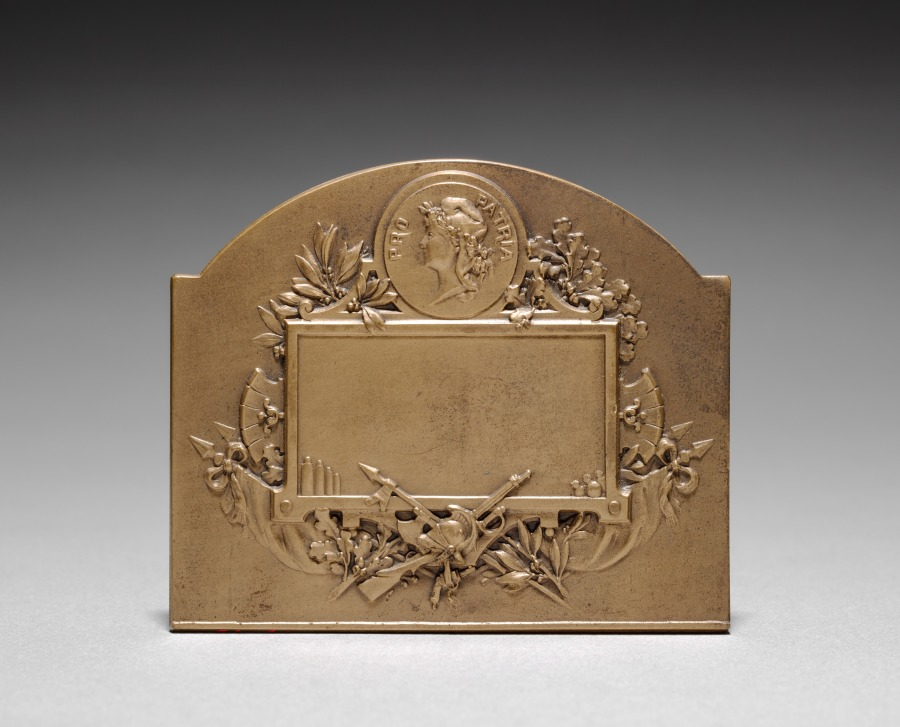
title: Medallion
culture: France, 19th-20th century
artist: Henri Emile Allouard (French, 1844–1929)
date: c.1915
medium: bronze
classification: Metalwork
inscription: "Pro Patria" (For our country); signed: "H. Allouard."